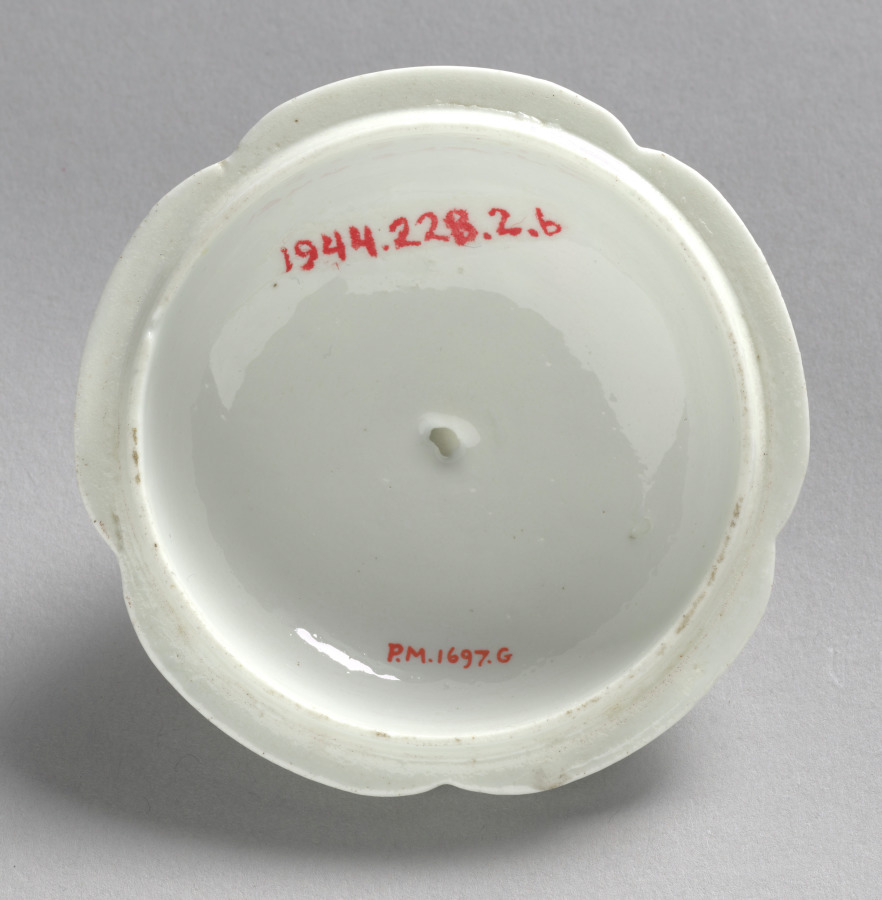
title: Sugar Bowl (cover)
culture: France, Chantilly, 18th century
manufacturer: Chantilly Porcelain Factory (French)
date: c. 1730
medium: soft-paste porcelain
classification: Ceramic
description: The pieces composing this individual tea set are entirely typical of Chantilly soft-paste porcelain in the Kakiemon style. Both the form and decoration of these pieces were inspired by Japanese prototypes. The use of knobs in the form of trumpet-shaped blossoms is characteristic of Chantilly wares.